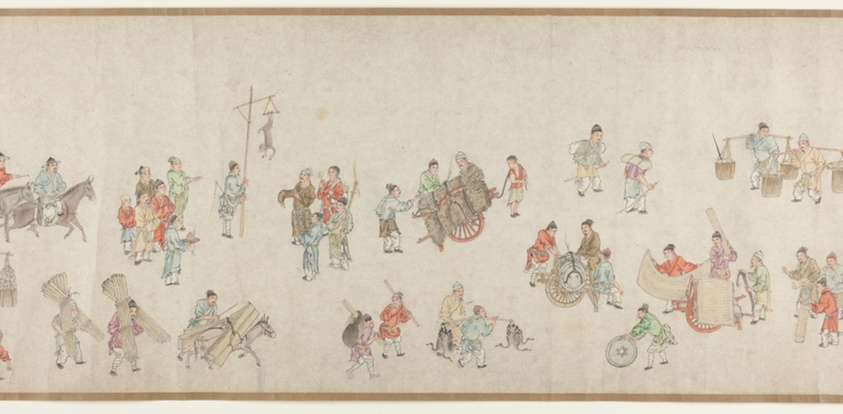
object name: Painting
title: Street Scenes in Times of Peace 太平風會圖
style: Chinese (culture or style)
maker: Zhu Yu (Zhu Junbi) 朱玉（朱君璧）; Chinese, 1293-1365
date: Yuan dynasty (1279–1368), 14th century 元朝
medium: Handscroll; ink and colors on paper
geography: China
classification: handscroll; painting; asian art